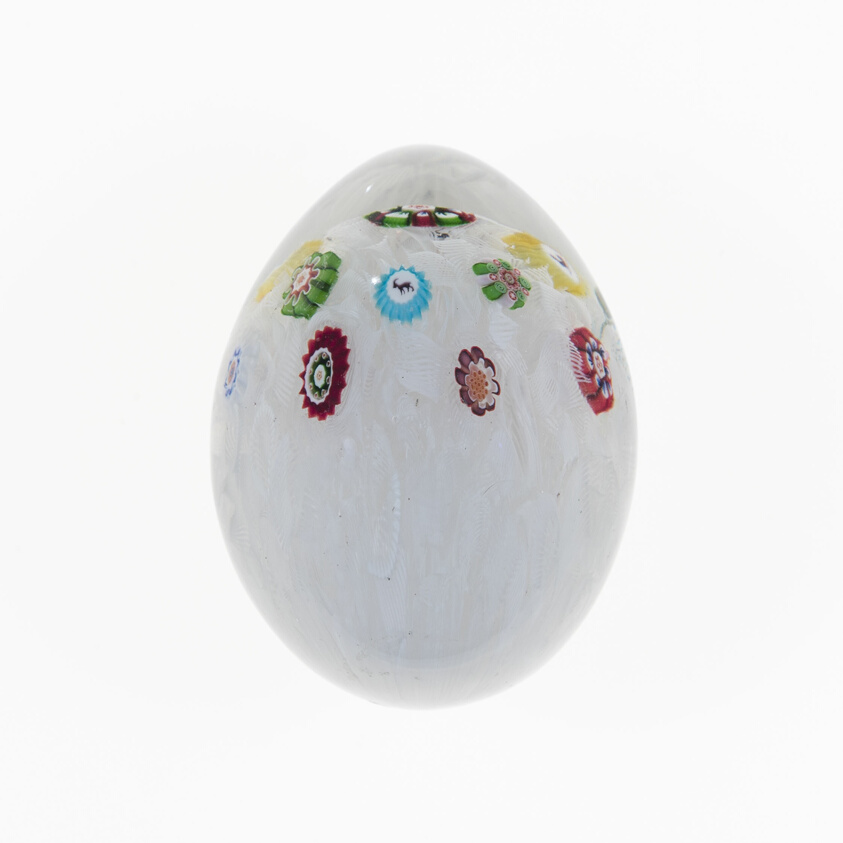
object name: Glass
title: Handcooler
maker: Baccarat Glassworks (Cristalleries de Baccarat); Lorraine, France, founded 1764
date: c. 1845–60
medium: Glass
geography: Baccarat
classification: paperweight; glass